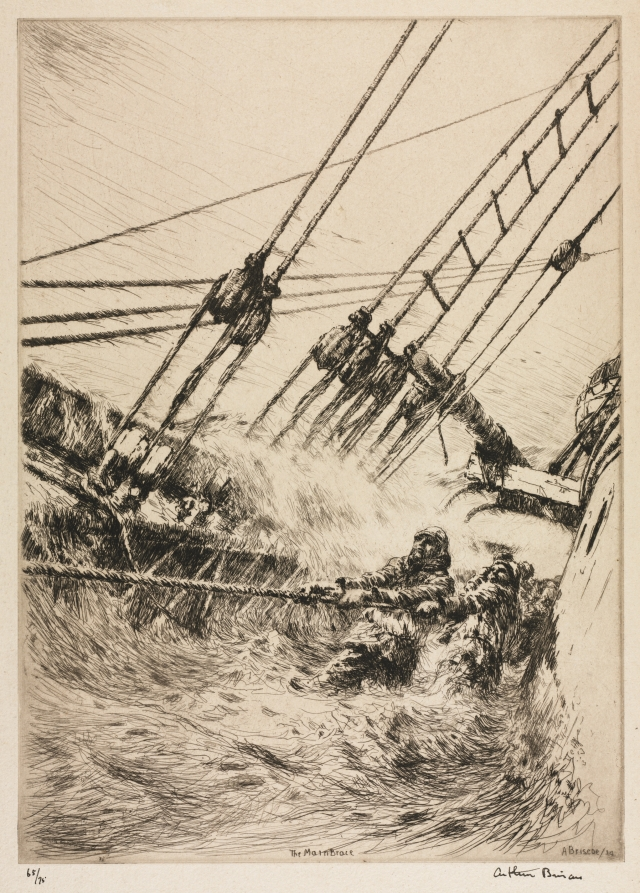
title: The Main Brace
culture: England, 20th century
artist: Arthur John Trevor Briscoe (British, 1873–1943)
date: 1929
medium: etching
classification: Print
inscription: Signed in ink, below bottom left corner of image. Bottom left corner of page, in pencil: "MK33728" Bottom right corner of page, in pencil: "A54230"